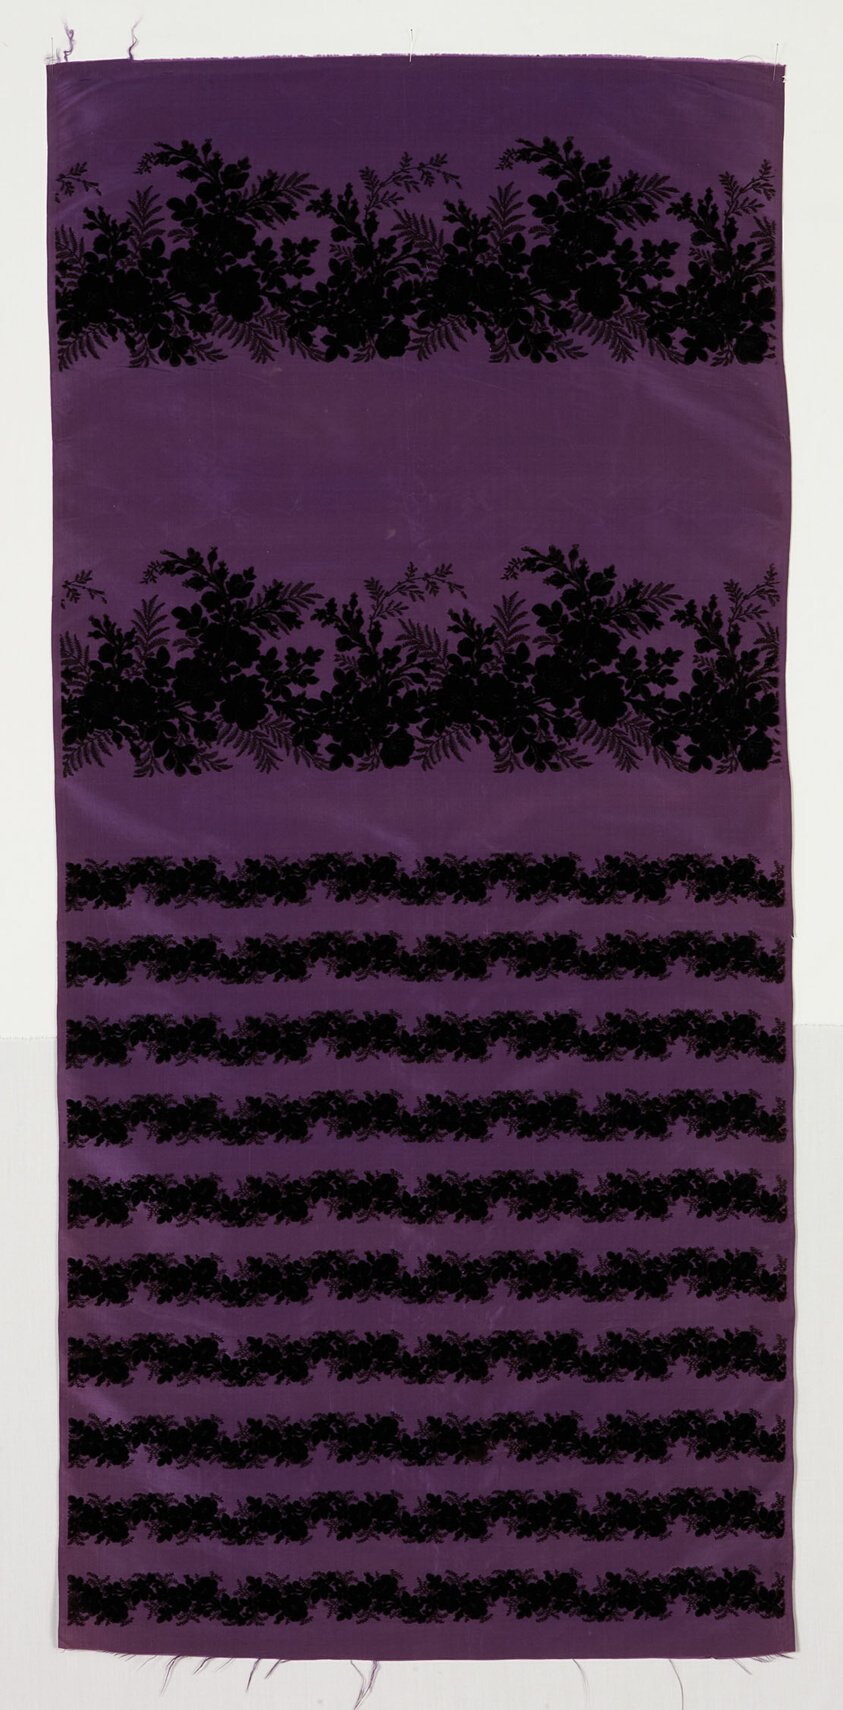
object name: Textile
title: Panel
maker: France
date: c. 1860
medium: Silk, plain weave with supplementary pile warps forming cut and uncut voided velvet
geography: France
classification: textile; weaving - velvet